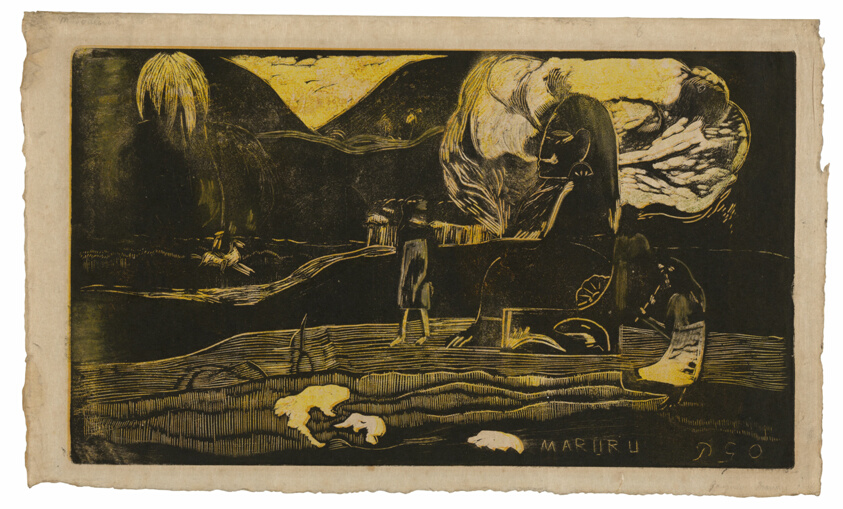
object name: Print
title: Maruru (Offerings of Gratitude), from the Noa Noa Suite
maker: Paul Gauguin (French, 1848-1903)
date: 1893/94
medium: Wood-block print, printed twice in yellow ocher and black inks, over a yellow ink tone block, and transferred golden-yellow, green, and orange oil-based media, some containing beeswax and conifer resin (probably pine resin), with brush and black ink and diluted yellow printing ink, on cream Japanese paper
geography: France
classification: woodcut; print; prints and drawing